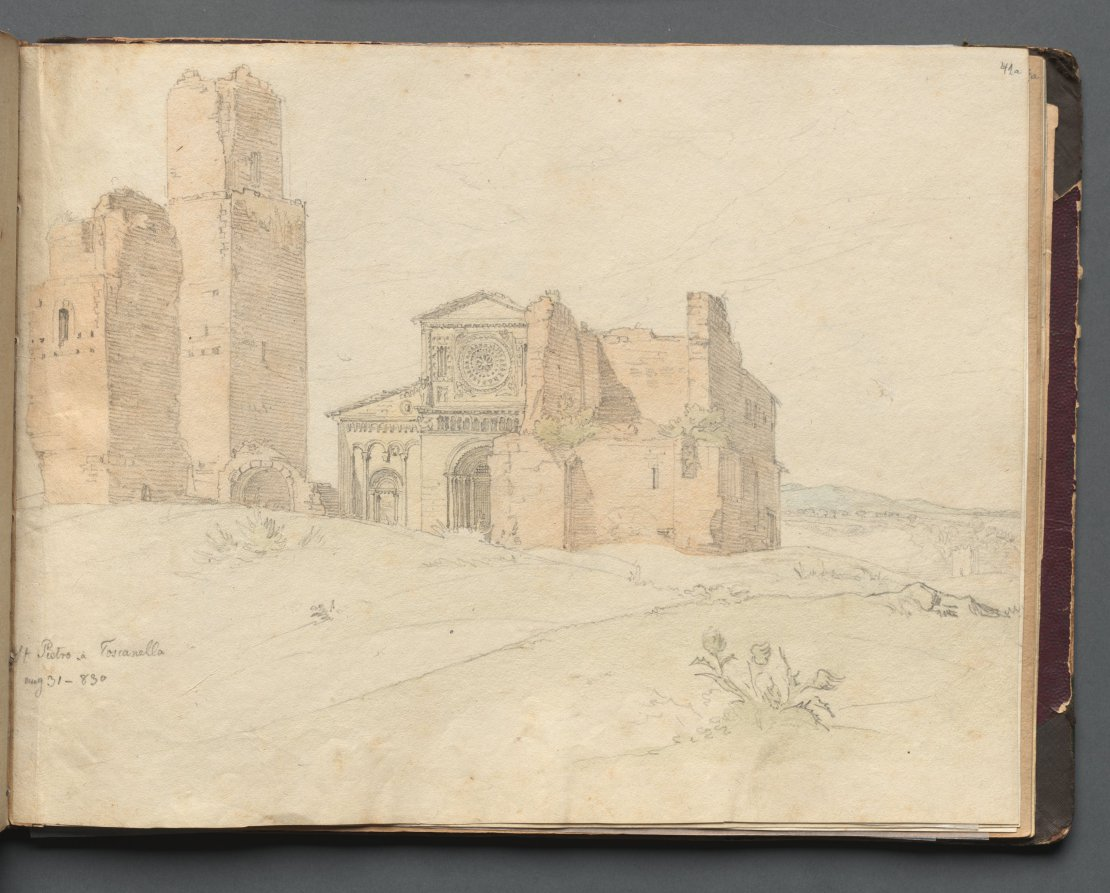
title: Album with Views of Rome and Surroundings, Landscape Studies, page 41a: "St. Pietro, Toscanella"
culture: Germany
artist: Franz Johann Heinrich Nadorp (German, 1794–1876)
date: c. 1830s-70s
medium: graphite with watercolor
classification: Bound Volume